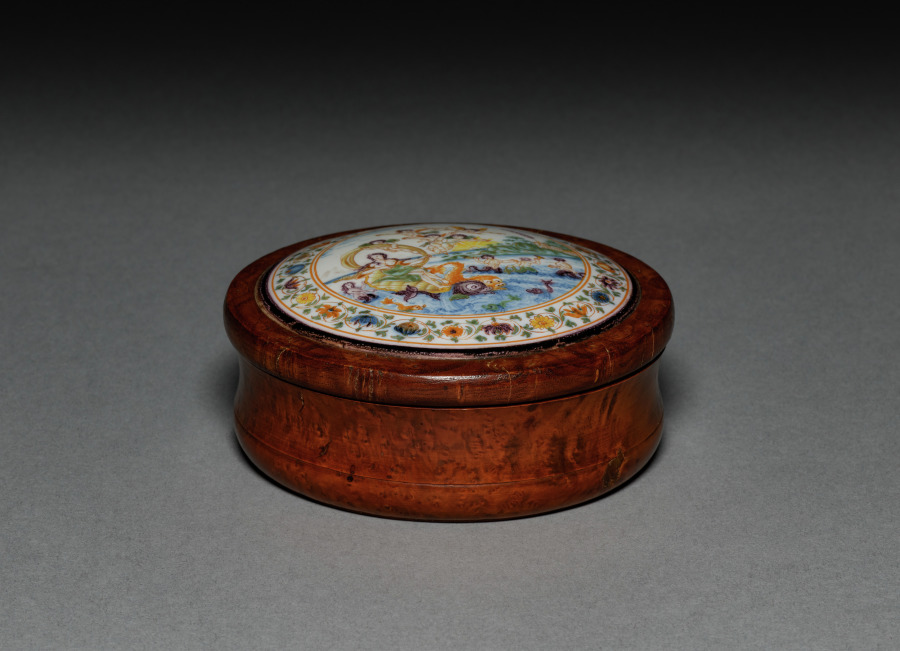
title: Box with Cover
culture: France, Moustiers, 18th century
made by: Olerys Factory (French)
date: c. 1750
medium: faience encased with burled wood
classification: Ceramic